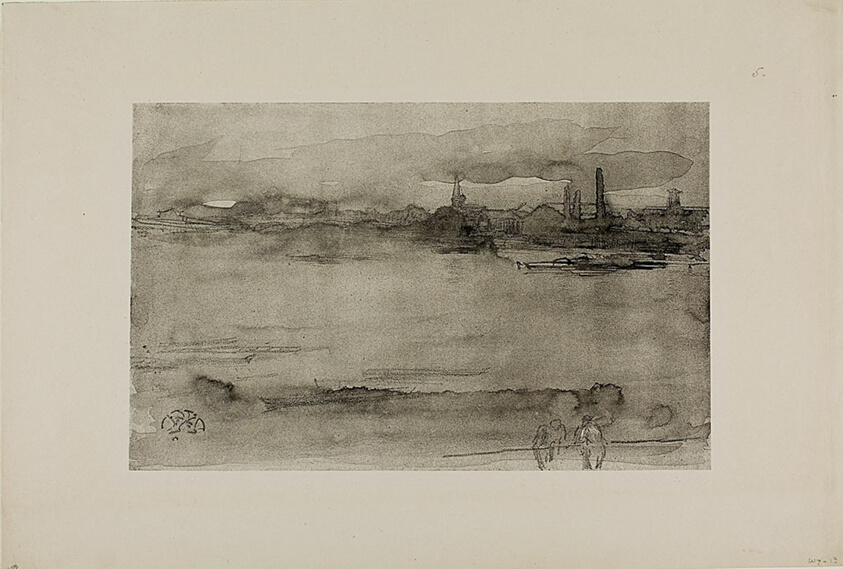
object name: Print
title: Early Morning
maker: James McNeill Whistler (American, 1834-1903)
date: 1878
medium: Lithotint with scraping, on a prepared half-tint ground, in black on cream wove proofing paper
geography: United States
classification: lithotint; lithograph; print; prints and drawing; paper